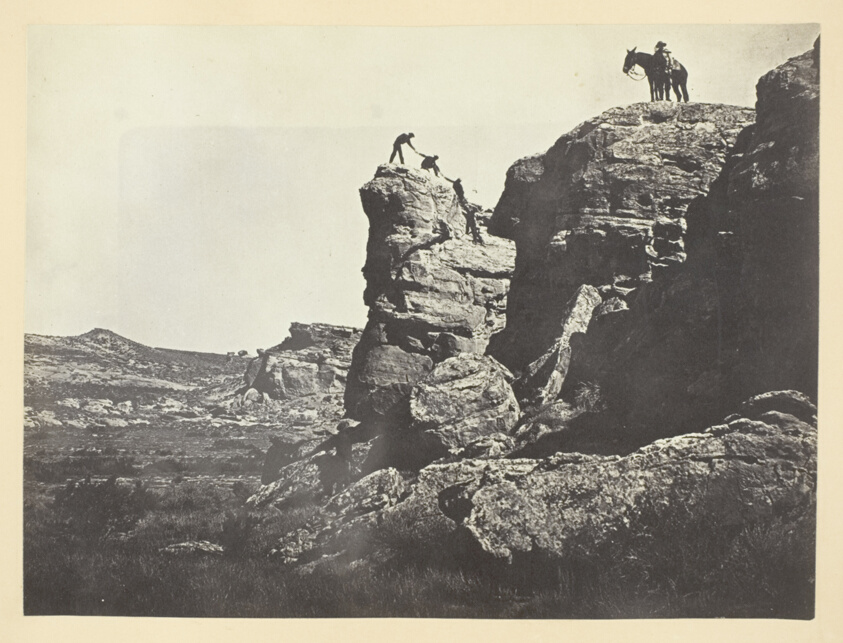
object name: Photograph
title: High Bluffs, Black Buttes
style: 19th century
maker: Andrew J. Russell; American, 1830–1902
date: 1868/69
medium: Albumen print, pl. VIII from the album "Sun Pictures of Rocky Mountain Scenery" (1870)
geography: United States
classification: photograph; albumen silver print; photography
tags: Collected by Hugh Edwards, landscapes